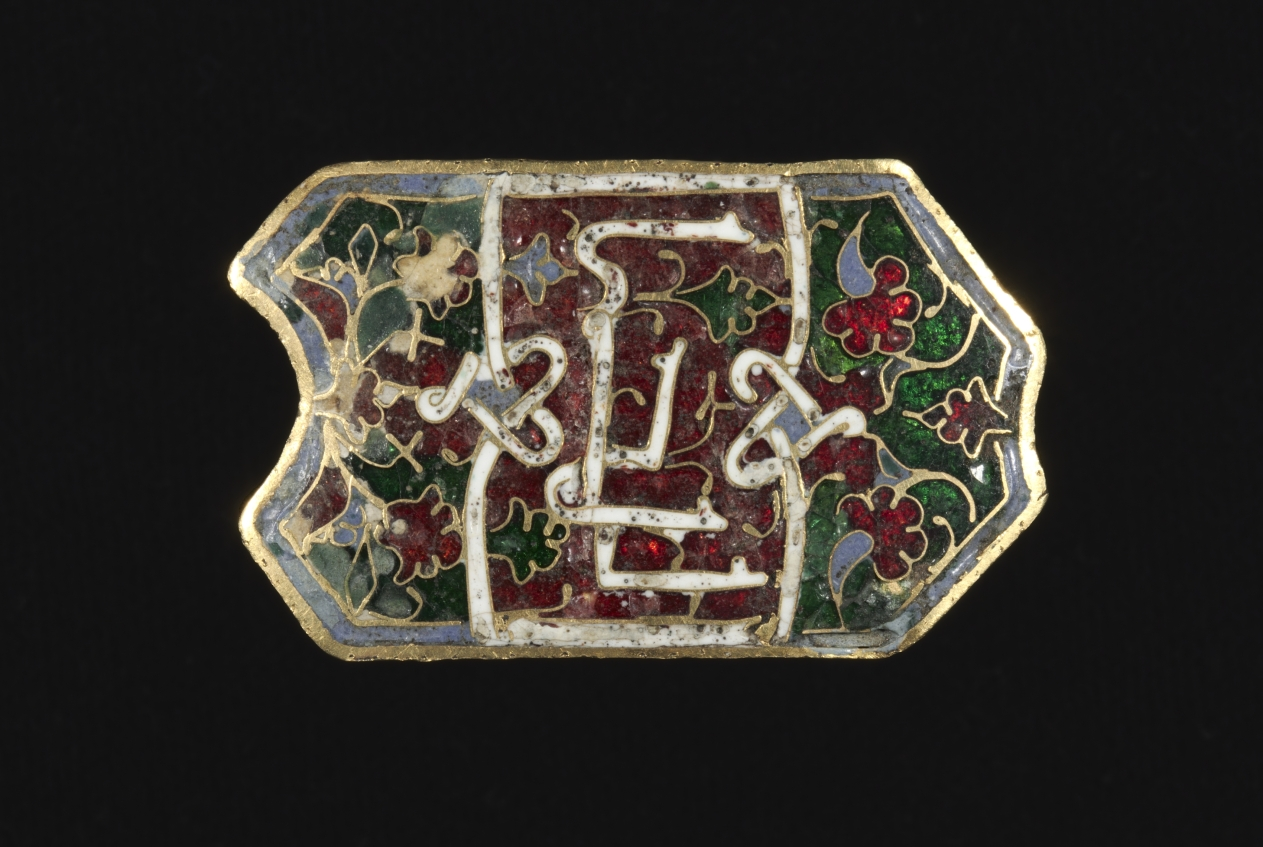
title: Plaque (Appliqué)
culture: Spain (Hispano-Moresque), 14th century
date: 1300s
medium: translucent enamel on gold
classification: Enamel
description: This oblong plaque is decorated with pseudo-Kufic (fake Arabic) designs indicating that it was produced in Spain under Muslim influence. It may have served as an applied ornament to some article of personal adornment such as a belt. It is possible that the design was inspired by Arabic coinage.